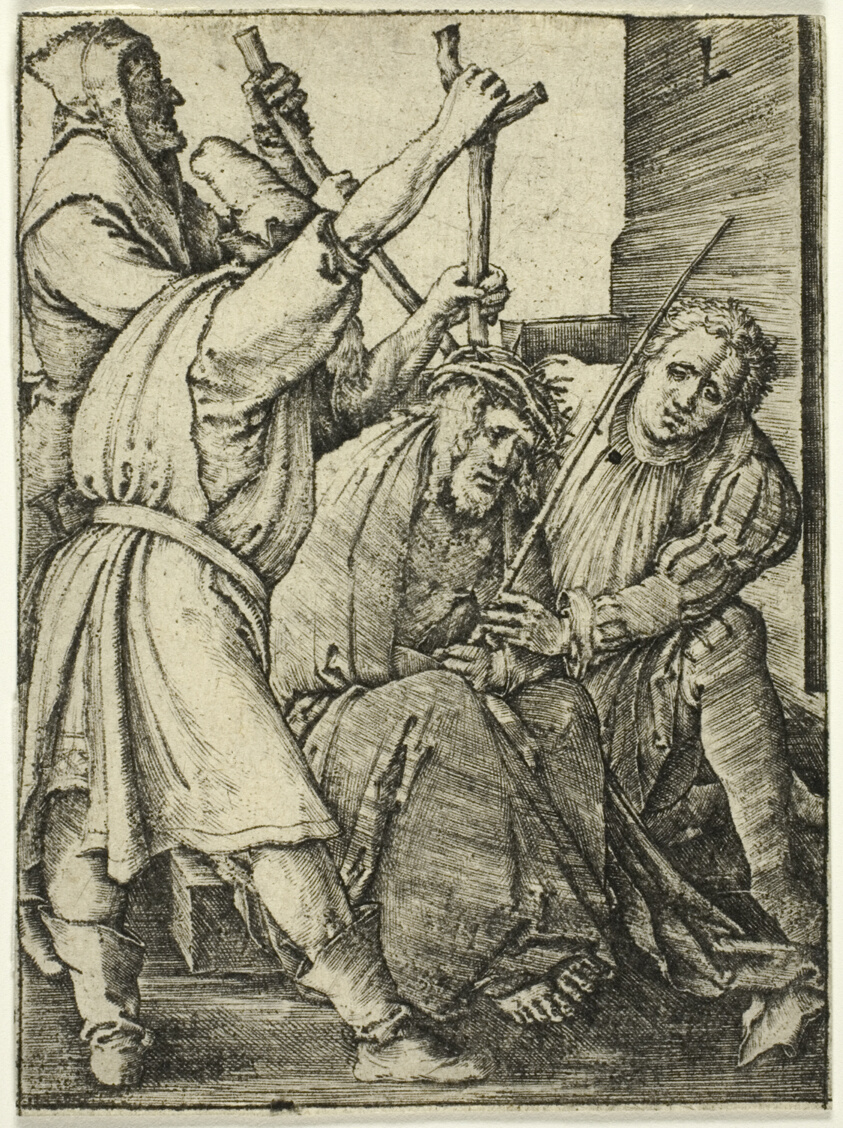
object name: Print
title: Christ Crowned with Thorns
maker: Lucas van Leyden (Netherlandish, c. 1494-1533)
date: c. 1512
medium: Engraving in black on cream laid paper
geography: Netherlands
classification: engraving; print; prints and drawing